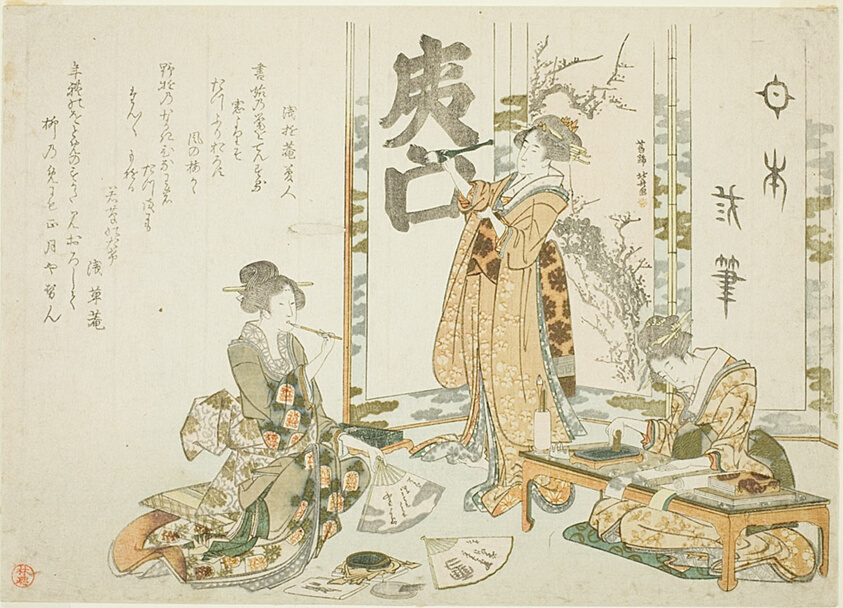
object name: Print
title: Three (Women) Calligraphers (Sanpitsu) at a Calligraphy Reunion (Shokai)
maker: Katsushika Hokusai 葛飾 北斎; Japanese, 1760-1849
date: 1800-10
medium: Color woodblock print; surimono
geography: Japan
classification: woodblock print; print; asian art